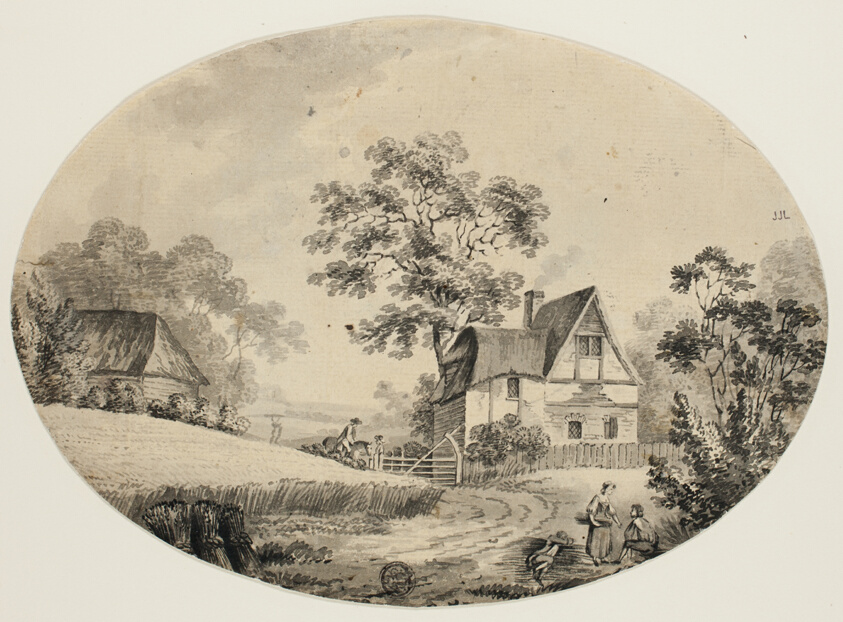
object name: Drawing and Watercolor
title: Rider Visiting Farm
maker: John Inigo Richards (English, 1731-1810); or Paul Sandby (English, 1725-1809); or Edward Dayes (English, 1763-1804)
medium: Pen and black ink, with brush and gray wash, on cream wove paper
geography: England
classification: ink or chalk wash; drawings (visual works); prints and drawing